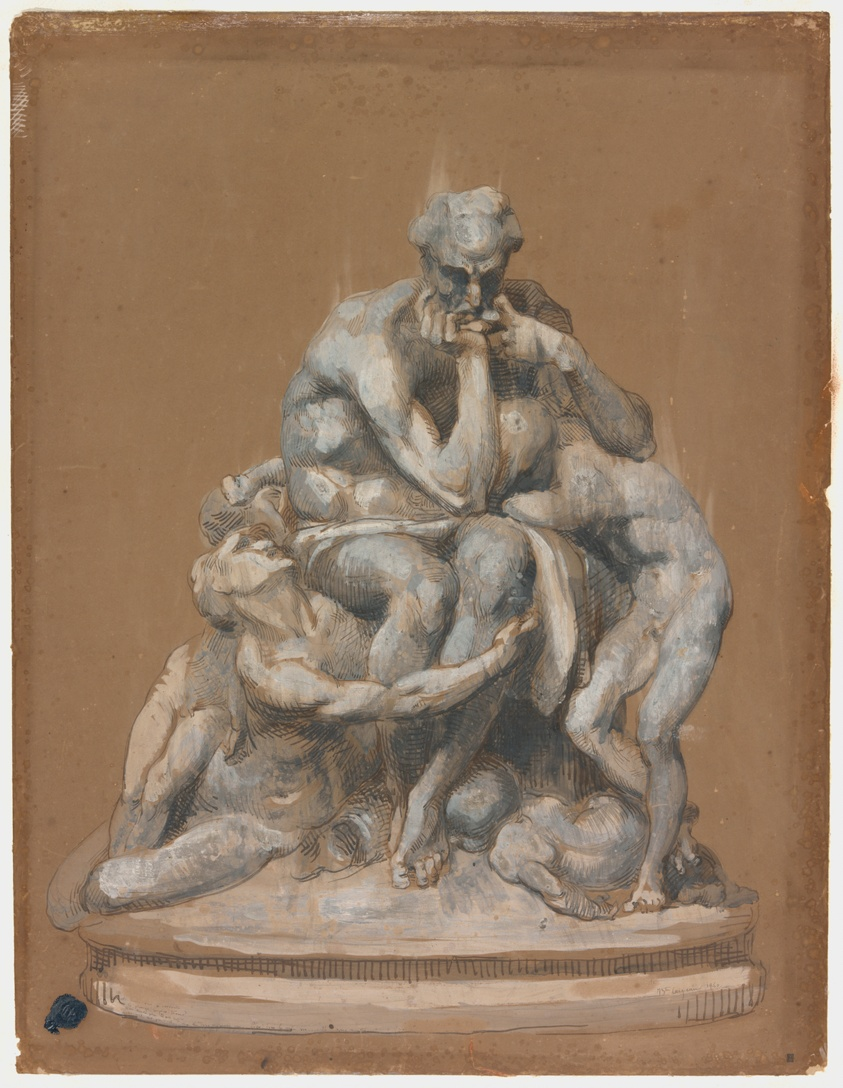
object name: Drawing and Watercolor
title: Study for the Sculpture Ugolino and His Children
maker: Jean Baptiste Carpeaux (French, 1827-1875)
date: 1860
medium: Pen and brown ink and opaque white and gray watercolors with white oil paint and black watercolor over black chalk on brown wove paper (Bristol board)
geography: France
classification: gouache; drawings (visual works); prints and drawing